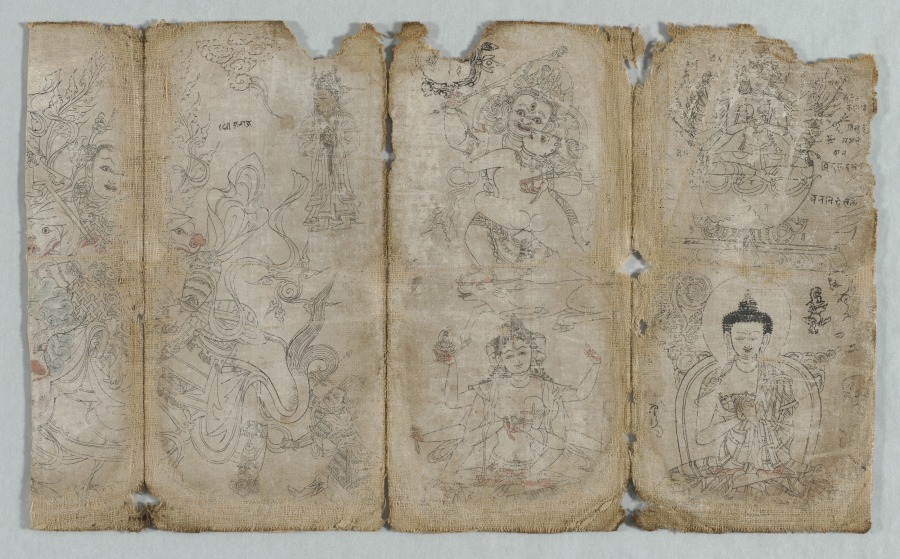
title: Iconographic Sketchbook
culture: Tibet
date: c. 1500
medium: ink and watercolor on cotton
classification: Drawing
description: These rare surviving pages of a practice book have drawings of prominent tantric figures. The line drawing is confident and masterful, with each iconographic element rendered with clarity and precision. The svelte proportions of the figures follow the style of the Khyenri school initiated in the second half of the 15th century by the artist Khyentse Wangchuk (about 1420-1500), known for his elegant and energetic depictions of the fierce manifestations of the enlightened beings.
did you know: Tibetan thangka painters referred to sketchbooks with drawings that delineate the iconographies—appearance and identifying attributes—of Buddhist figures.